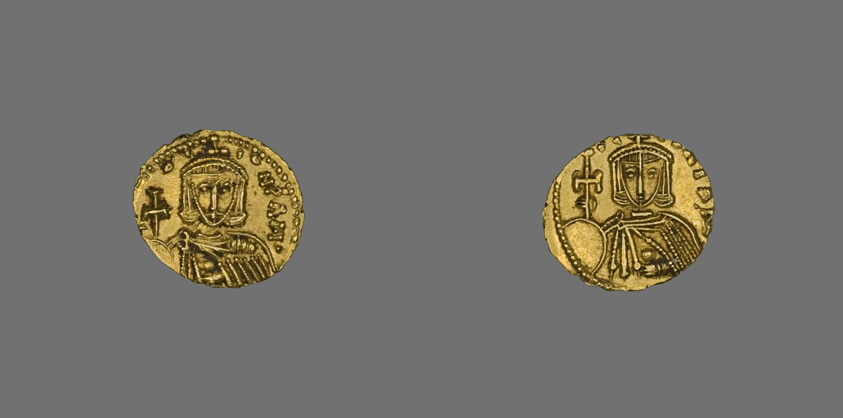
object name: Coin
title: Tremissis (Coin) of Leo III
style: byzantine, european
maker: Byzantine, minted in Constantinople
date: 720–741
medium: Gold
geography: Istanbul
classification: coin; ancient art